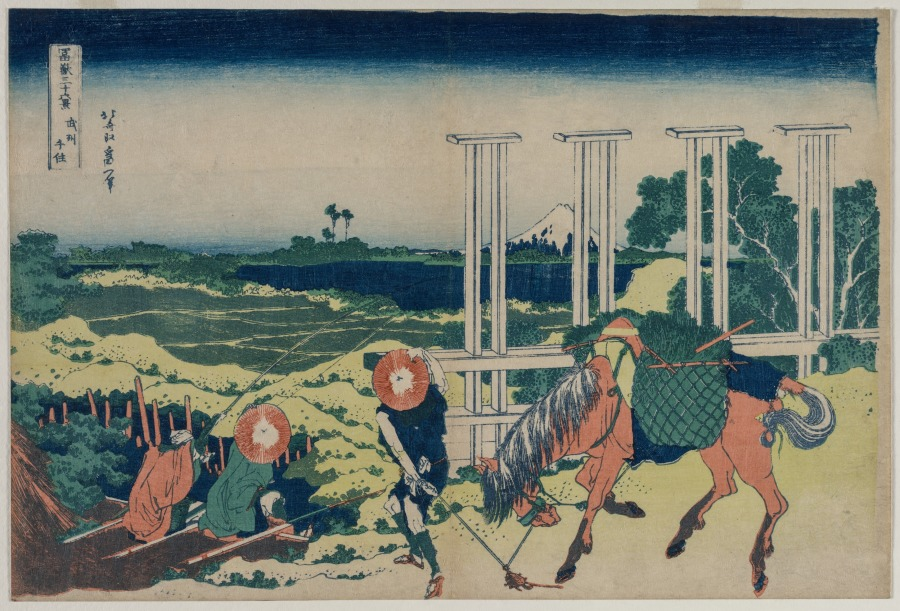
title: The Weir at Senju in Musashi Province (from the series Thirty-Six Views of Mt. Fuji)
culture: Japan, Edo period (1615–1868)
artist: Katsushika Hokusai (Japanese, 1760–1849)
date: early 1830s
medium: color woodblock print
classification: Print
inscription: Signature: Hokusai aratame Iitsu hitsu Publisher: Nishimuraya Yohachi